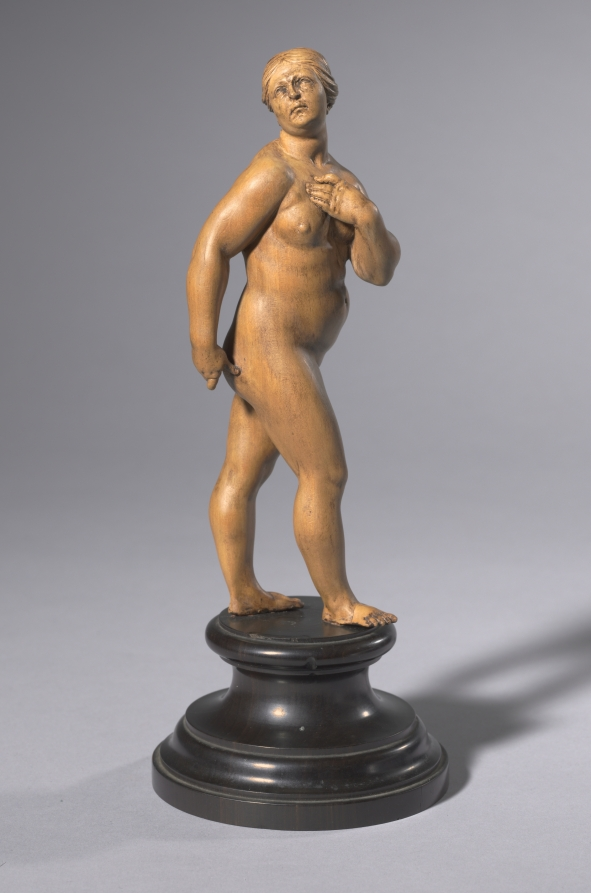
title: Eve Expelled from Paradise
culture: Germany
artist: Leonhard Kern (German, 1588–1662)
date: c. 1640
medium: wood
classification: Sculpture